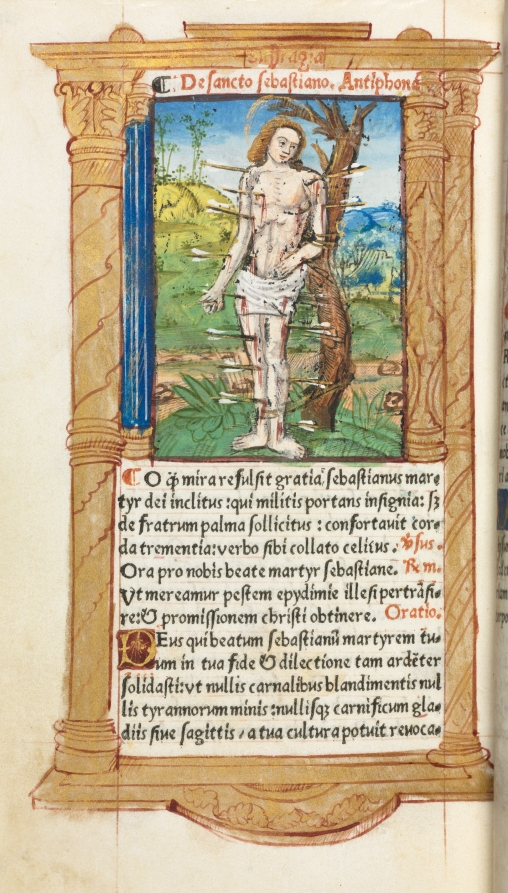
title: Printed Book of Hours (Use of Rome): fol. 102v, St. Sebastian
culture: France, Paris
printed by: Guillaume Le Rouge (French, Paris, active 1493–1517)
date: 1510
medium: 112 Printed folios on parchment, bound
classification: Bound Volume